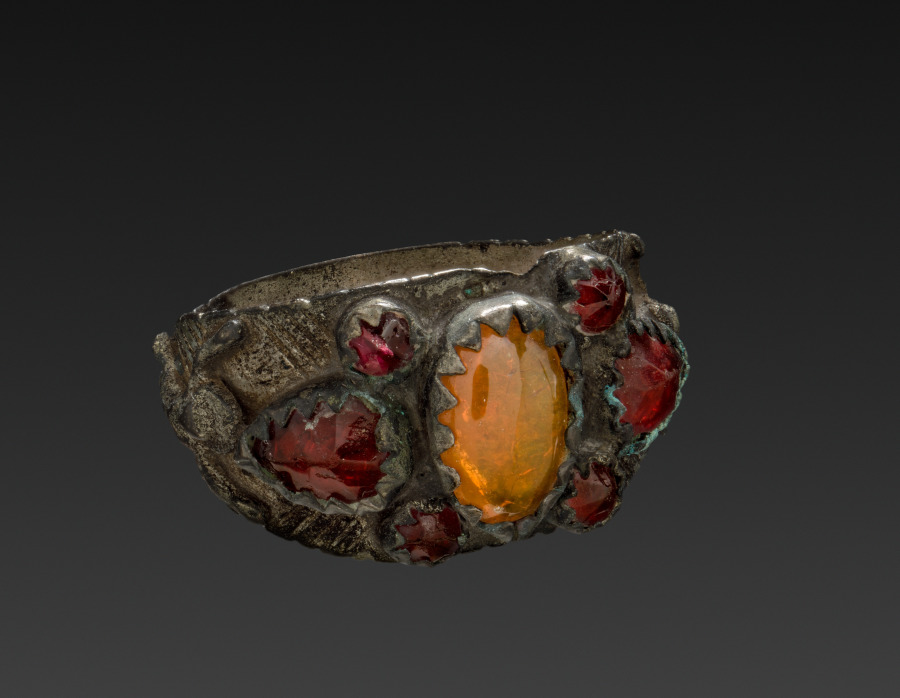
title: Peasant's Ring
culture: Germany, 18th-19th century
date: 1700s - 1800s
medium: silver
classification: Jewelry